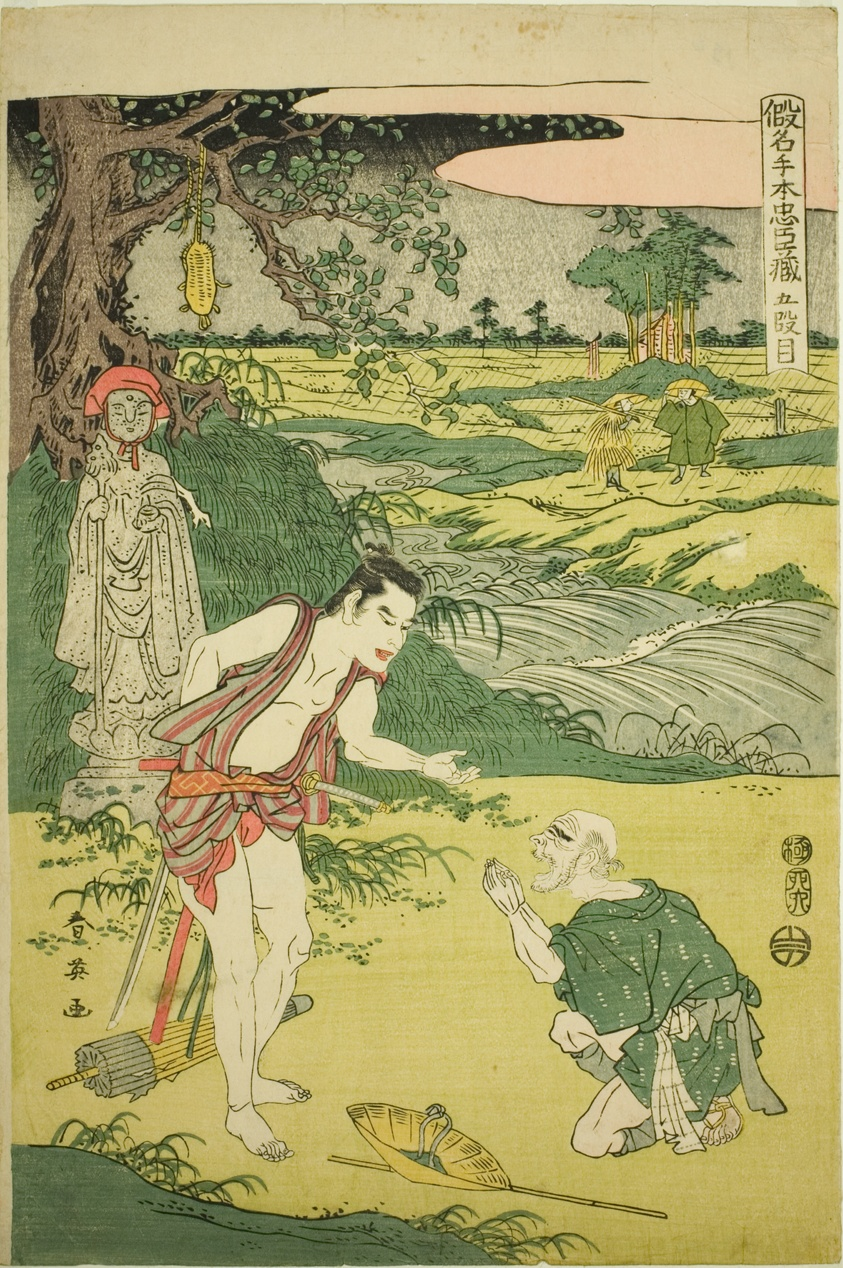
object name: Print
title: Act Five: Yamazaki Highway from the play Kanadehon Chushingura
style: Japanese (culture or style)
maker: Katsukawa Shun'ei; Japanese, 1762-1819; Publisher: Ise-Ya Magobei; Japanese, Unknown; Sadakuro; Japanese, Unknown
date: 1807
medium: Color woodblock print; oban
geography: Japan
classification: woodblock print; print; asian art